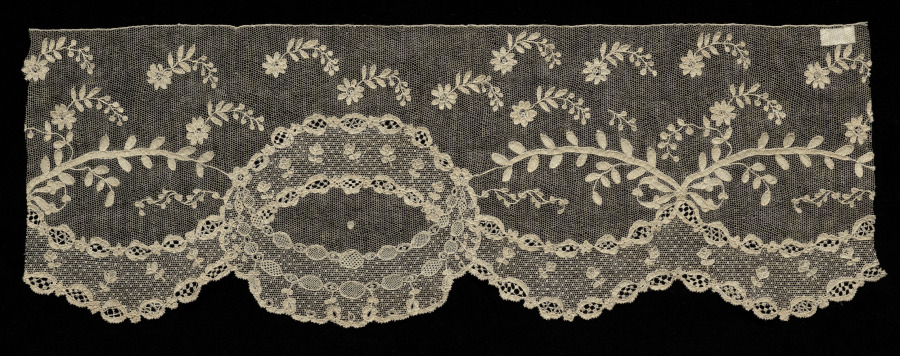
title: Lace Edging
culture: Italy, Burano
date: 1900s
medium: Linen: needle lace (Burano Point)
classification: Lace